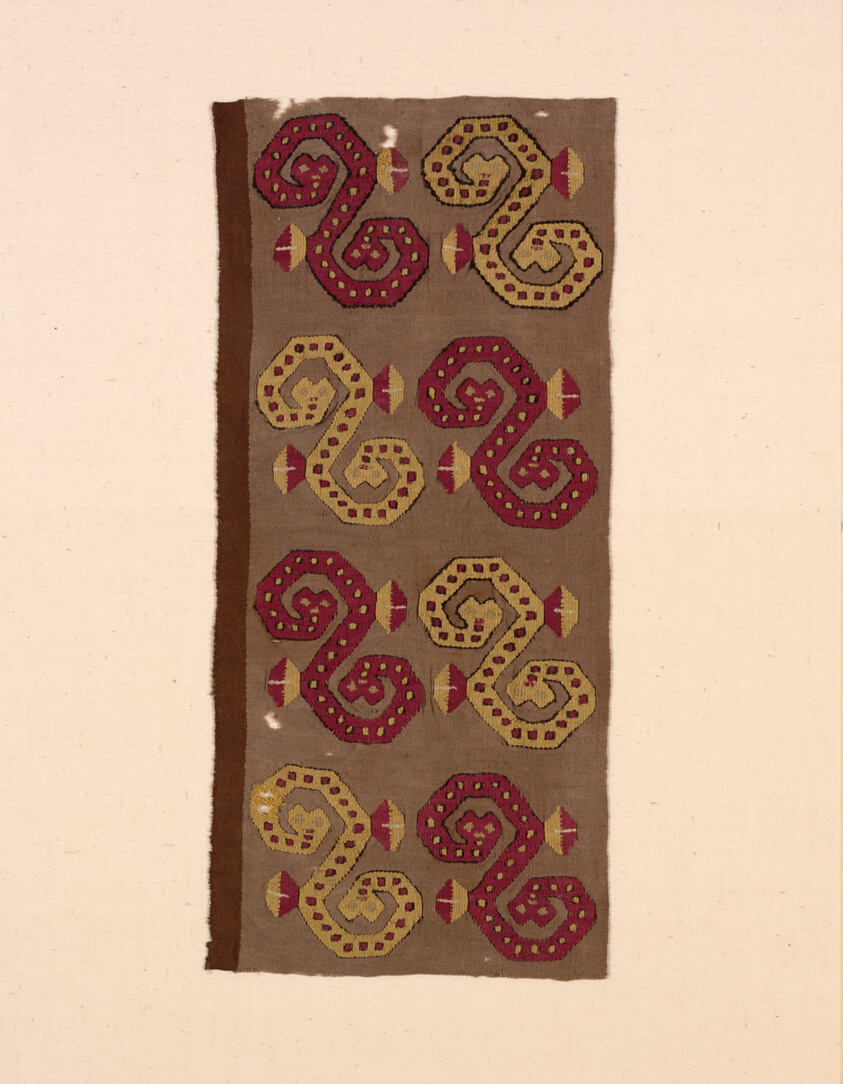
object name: Textile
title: Fragment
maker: Probably central coast, Peru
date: A.D. 1000/1476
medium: Cotton and wool (camelid), plain weave with inserts of slit and single dovetailed tapestry weave with interlaced and wrapping outlining wefts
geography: Peru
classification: textile; weaving